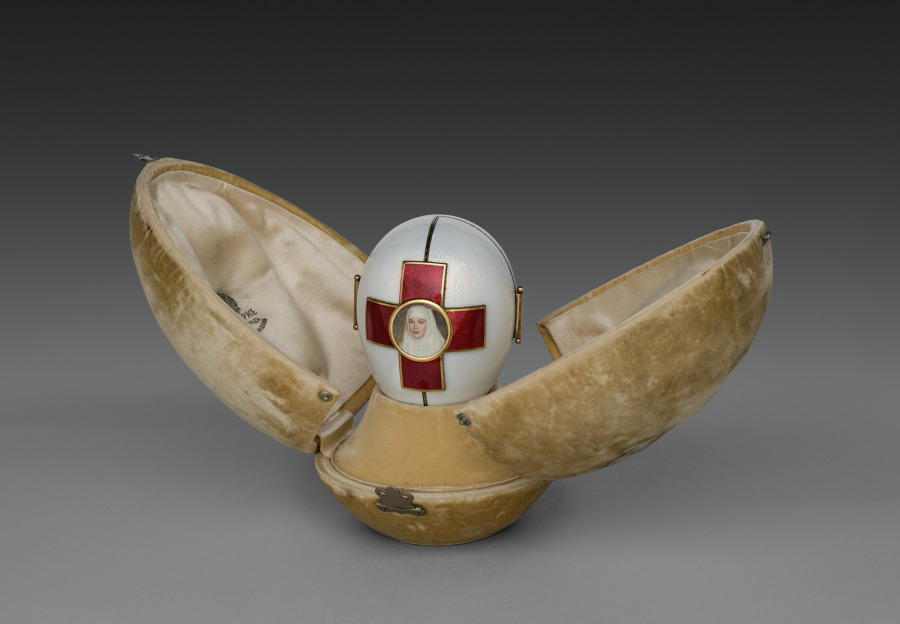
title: Imperial Red Cross Easter Egg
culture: Russia, St. Petersburg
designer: Peter Carl Fabergé (Russian, 1846–1920)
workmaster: Henrik Wigström (Russian, 1862–1923)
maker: House of Fabergé (Russian, 1842–1918)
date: 1915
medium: gold, silver gilt, enamel, glass, ivory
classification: Miscellaneous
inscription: inscribed on interior of egg: symbols for Alpha and Omega and imperial crown for Alexandra Feodorovna; 1915; inscriptions in Cyrillic, Old Church Slavonic, and Roman letters which identify Sts. Olga and Tatiana and presumably describe the central scene of the triptych.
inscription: Inscribed on silk velvet and satin lined case: double-headed eagle, Fabergé, Petersburg, Moscow, London (all in Cyrillic on lining of case); 17.559, abbreviation for "Red Cross" (in Cyrillic in red ink on outside of case).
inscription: Hallmarks: 72, Kokoshnik, lower case alpha in script [assay mark of St. Petersburg, 1908-26]; H.W. [initials of workmaster Henrik Wigström]; Fabergé (in Cyrillic).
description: The House of Fabergé made two imperial Easter eggs in 1915 that honored the contributions of Tsarina Alexandra and her two eldest daughters, Olga and Tatiana, to the war effort as Red Cross Sisters of Mercy. Compared to other Fabergé eggs elaborately ornamented with jewels, the eggs reflected the mood of austerity in Russia during World War I. This version becomes an icon when opened, revealing miniatures of the patron saints of the tsarina’s daughters. After the Russian Revolution, this relic of the Tsarist past was sold by the Soviet government to raise needed cash for the treasury.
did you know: This egg was confiscated by the Bolsheviks during the Russian Revolution and sold by the government of Josef Stalin in the 1930s to raise money for the Soviet treasury.